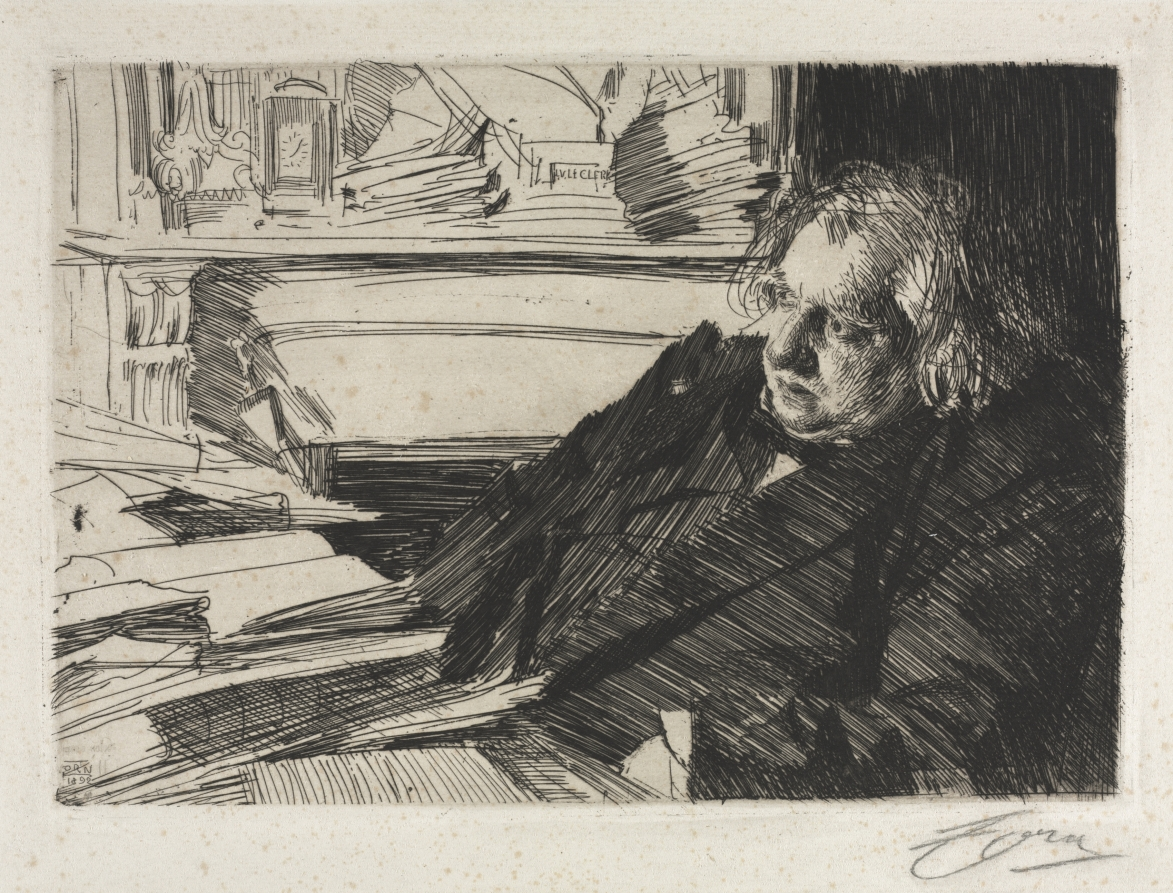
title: Ernest Renan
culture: Sweden, late 19th Century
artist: Anders Zorn (Swedish, 1860–1920)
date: 1892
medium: etching and drypoint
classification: Print